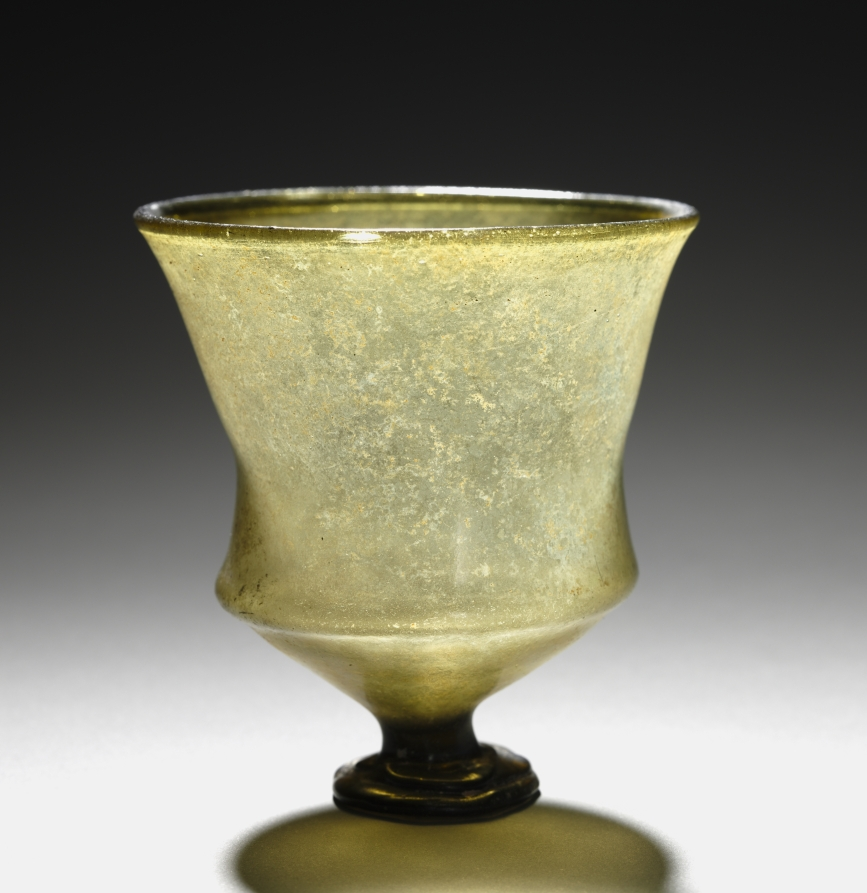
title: Bell Beaker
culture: Syro-Palestinian(?)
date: 500s–600s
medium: glass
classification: Glass